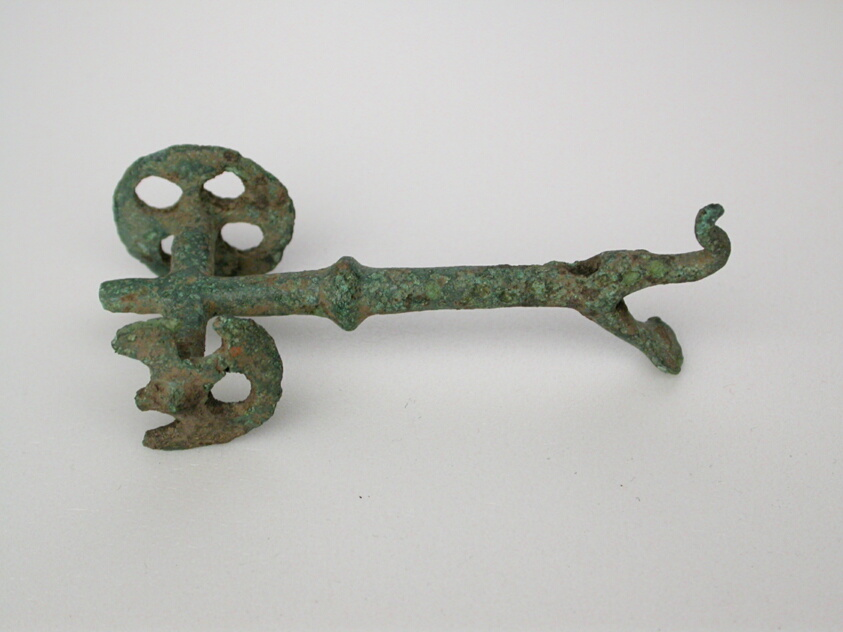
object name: Decorative Arts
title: Bird on Wheeled Stand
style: geometric, ancient, greek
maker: Greek; Thessaly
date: Geometric Period (750–700 BCE)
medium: Bronze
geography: Greece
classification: votive offering; ex-voto; decorative arts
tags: bird